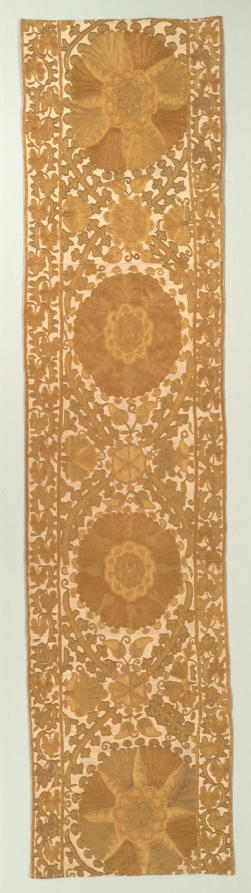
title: Panel, Probably from a Curtain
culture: Uzbekistan, Bukhara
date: 1800s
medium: embroidery: silk on cotton tabby ground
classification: Embroidery